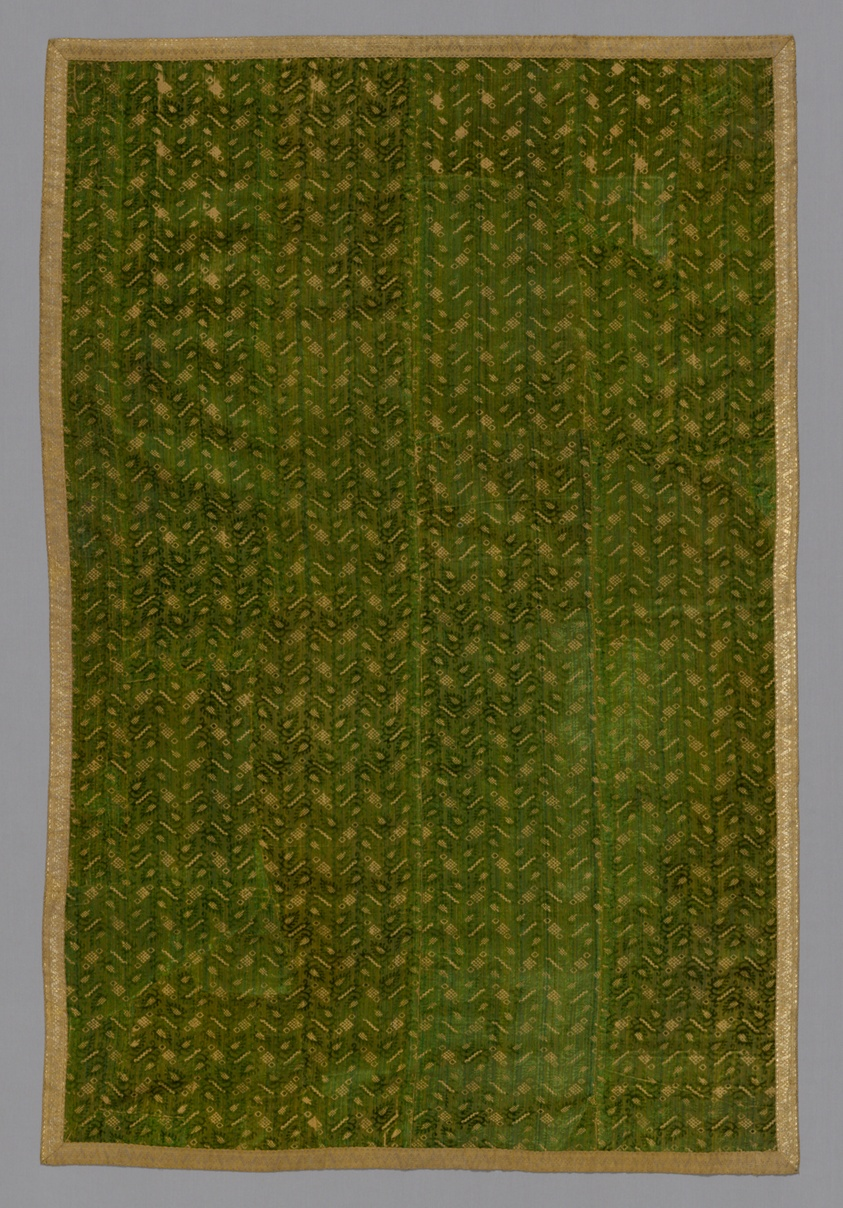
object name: Textile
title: Panel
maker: Italy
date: 17th century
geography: Italy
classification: textile; weaving - velvet